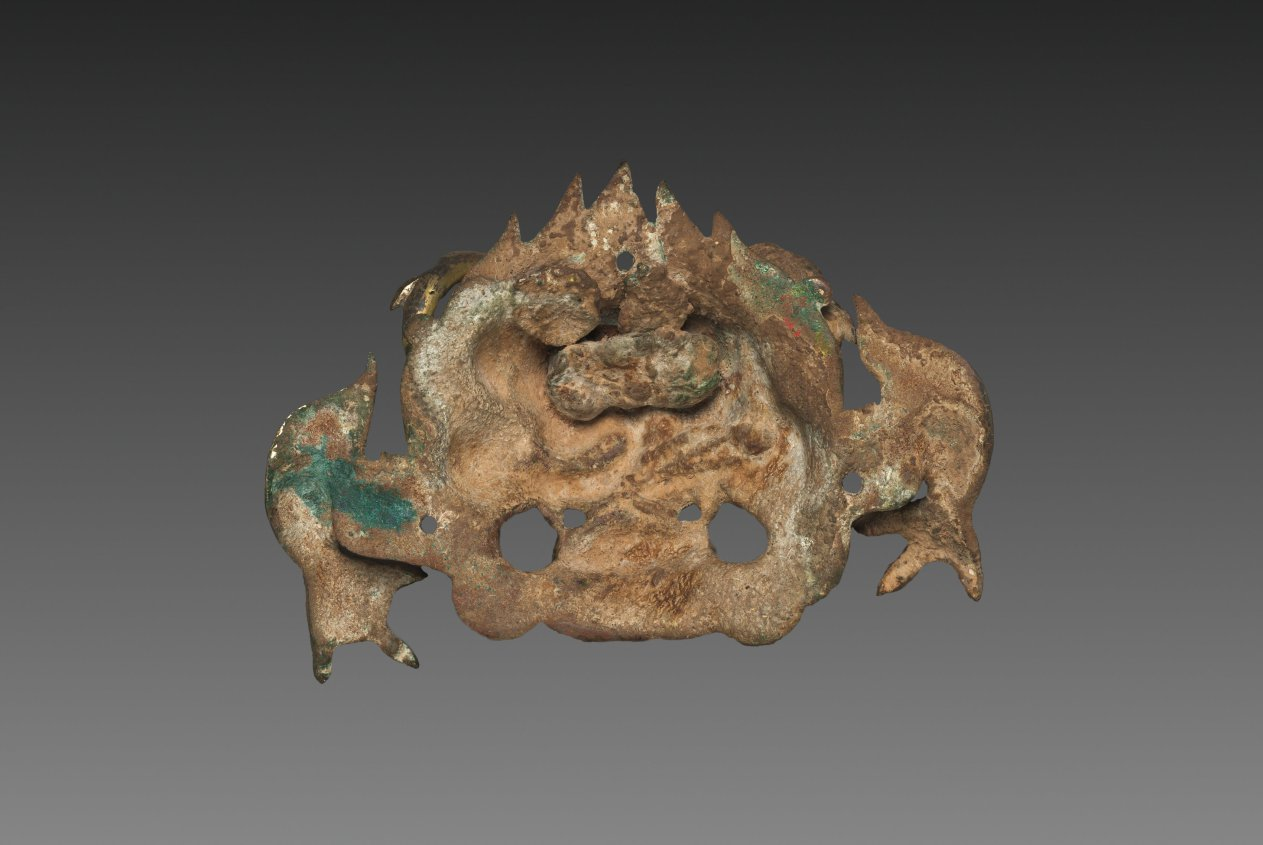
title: Monster Face: Door Ring Holder (Pushou)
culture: China, Henan province, Northern Dynasties period (386–581 CE)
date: 500s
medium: gilt bronze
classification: Metalwork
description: This gilt bronze Door Ring Holder is in the form of a monster head with curving horns, protruding eyes, three-clawed paws, curling beard, and flame-shaped hair. The tongue dangles from the mouth, in which the creature originally grasped a ring. While it had a practical function as a door knocker, the intimidating form could also frighten away both intruders and evil spirits.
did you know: Three rivet holes (one on the forehead and one by each limb) were used to nail the mask onto a door.